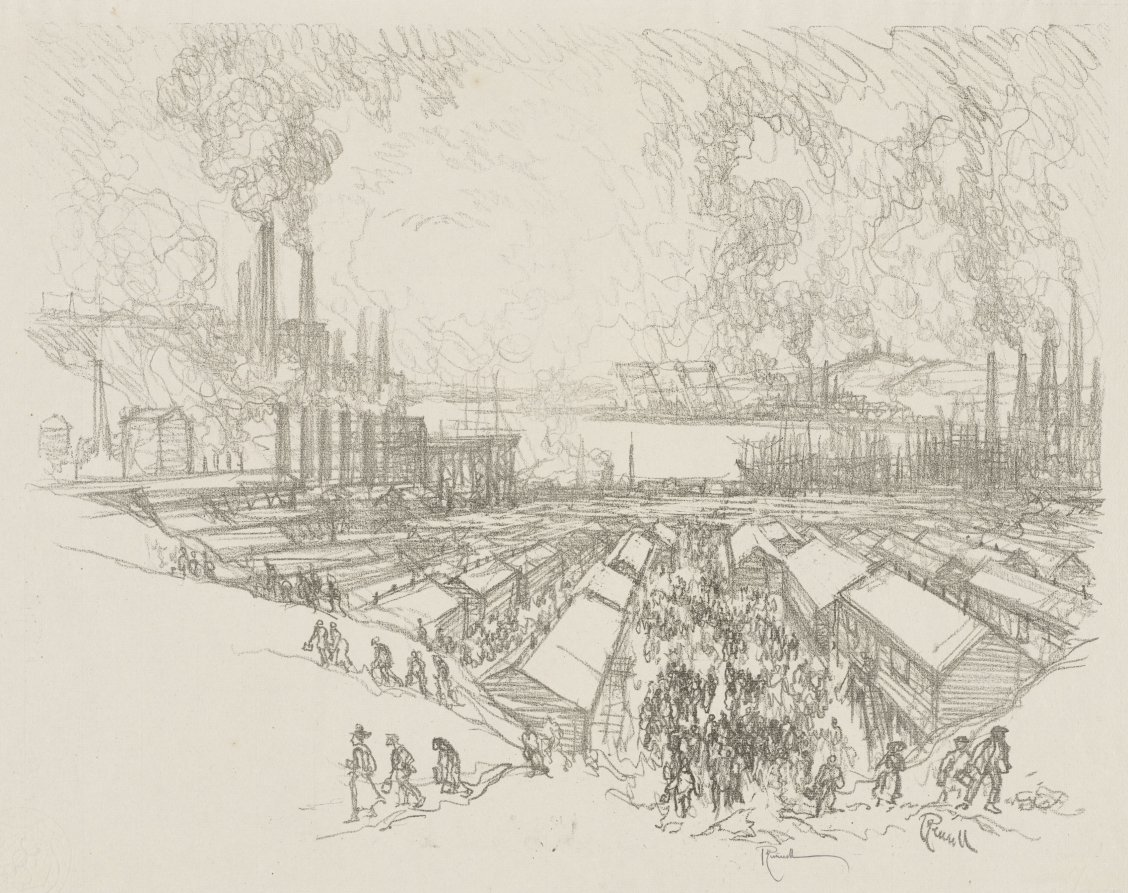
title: English War Work: Five O'Clock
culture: America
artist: Joseph Pennell (American, 1857–1926)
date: 1916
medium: lithograph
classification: Print